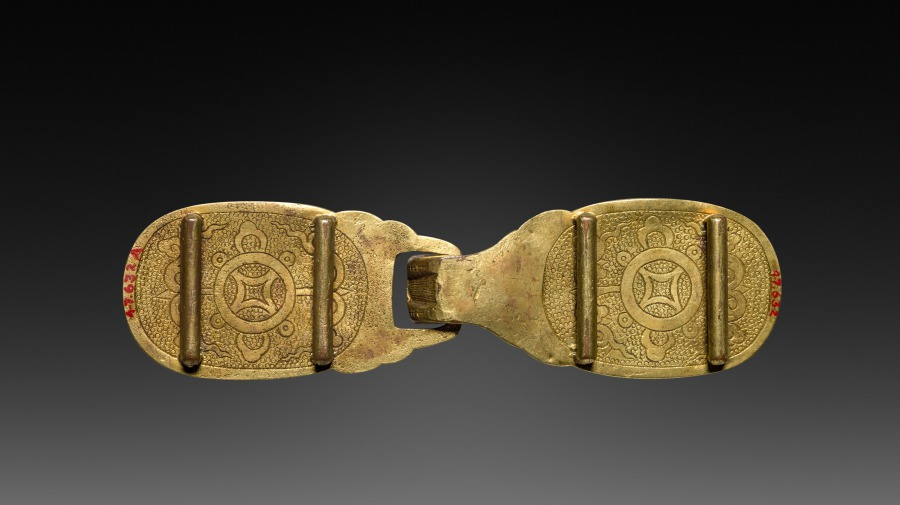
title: Buckle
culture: China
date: 1900s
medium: gilt brass set with quartz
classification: Jewelry